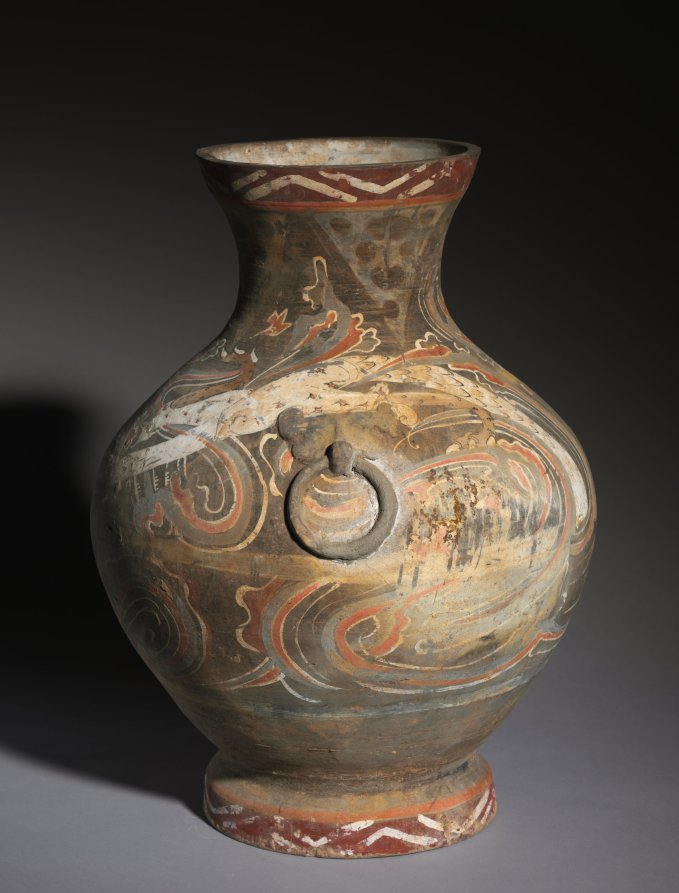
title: Jar (Hu)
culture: China, probably Henan province, Western Han dynasty (206 BCE–8 CE)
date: 202 BCE–9 CE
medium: earthenware with slip and painted decoration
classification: Ceramic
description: Instead of depicting a real landscape, the artist focused on the rhythmic forces of nature and the movement of energy, using the scrolling form as a symbol common to all changes in nature: cloud vapors, waves, and mountains alike. Here a dragon hovers among sweeping scrolls.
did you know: This earthenware wine jar's shape mimics costly bronzes, but the handles have rings that are fixed to the surface of the pot, rendering them useless.